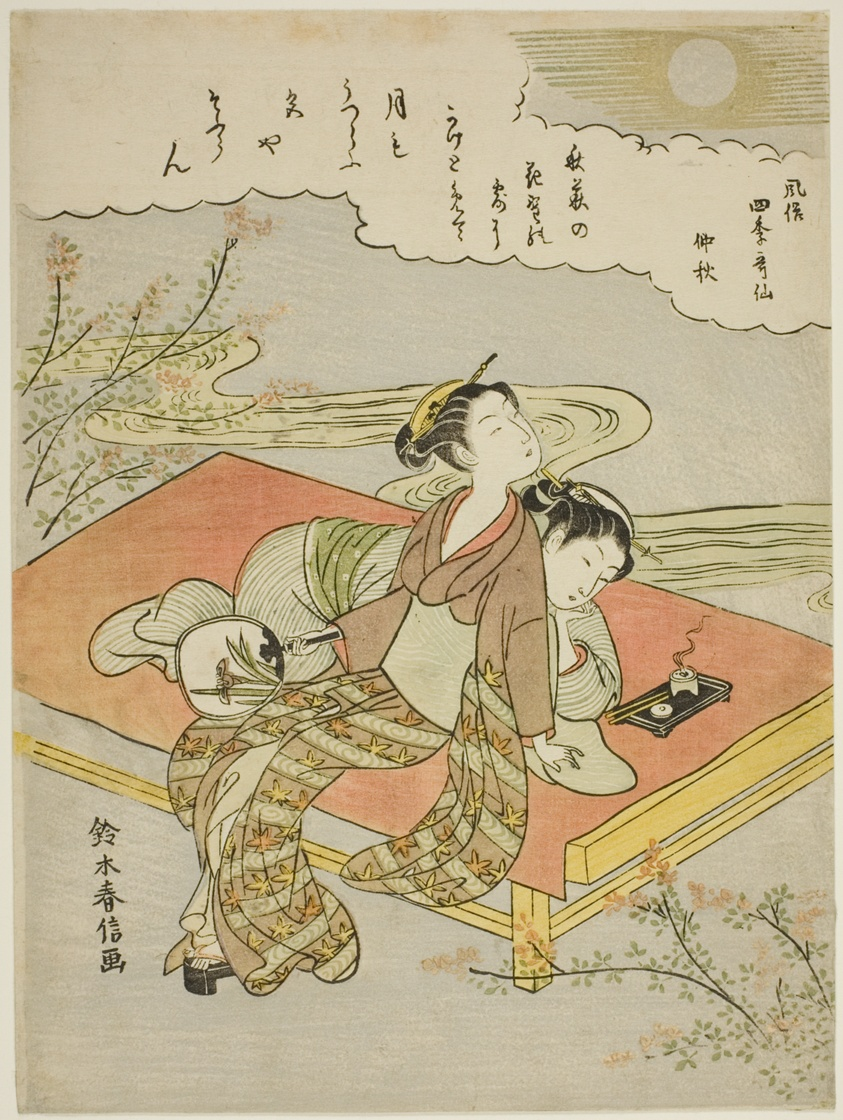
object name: Print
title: The Eighth Month (Chushu), from the series "Popular Versions of Immortal Poets in Four Seasons (Fuzoku shiki kasen)"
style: Japanese (culture or style)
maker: Suzuki Harunobu 鈴木 春信; Japanese, 1725 (?)-1770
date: c. 1768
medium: Color woodblock print; chuban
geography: Japan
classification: woodblock print; print; asian art